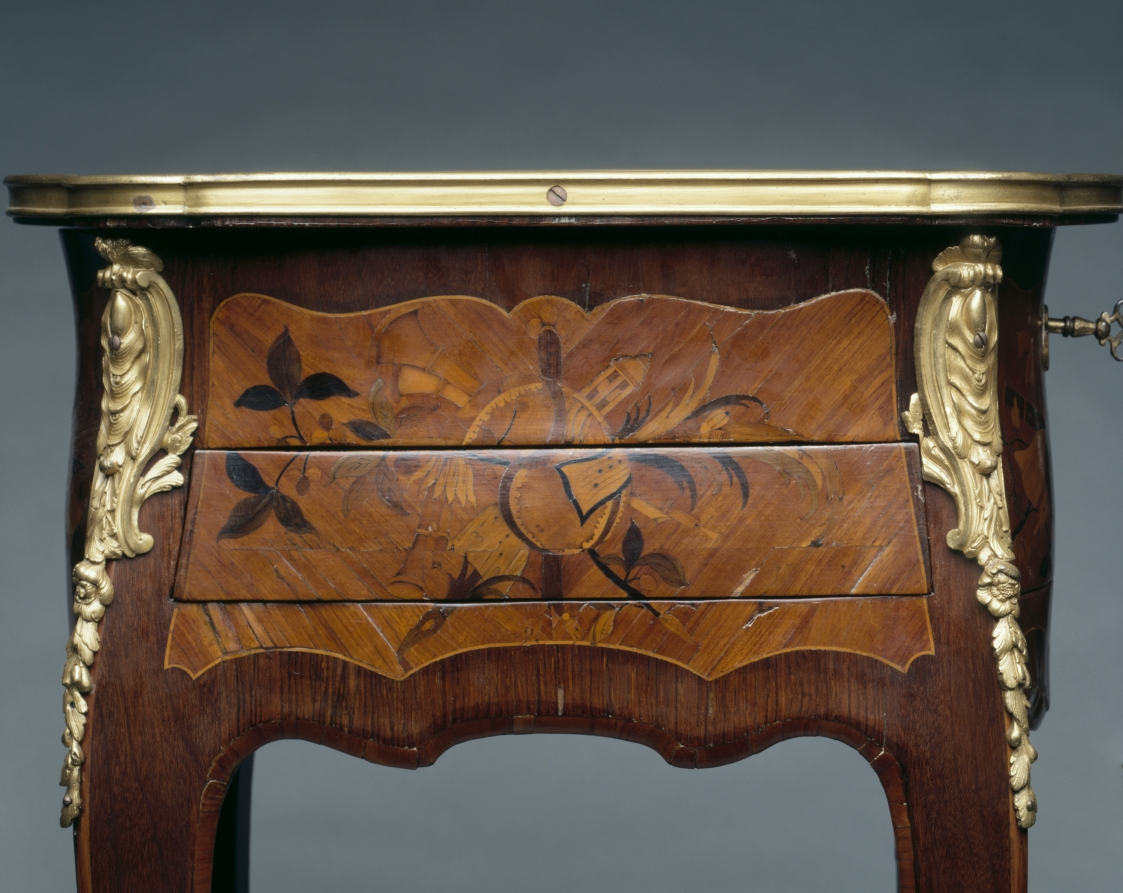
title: Work Table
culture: France, Paris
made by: Bernard Peridiez (French, d. 1757)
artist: or Gerard Peridiez (French, born c.1730)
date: 1700–1799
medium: wood marquetry with gilt bronze mounts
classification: Furniture and woodwork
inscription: signed under shelf: B. Peridiez JNE.